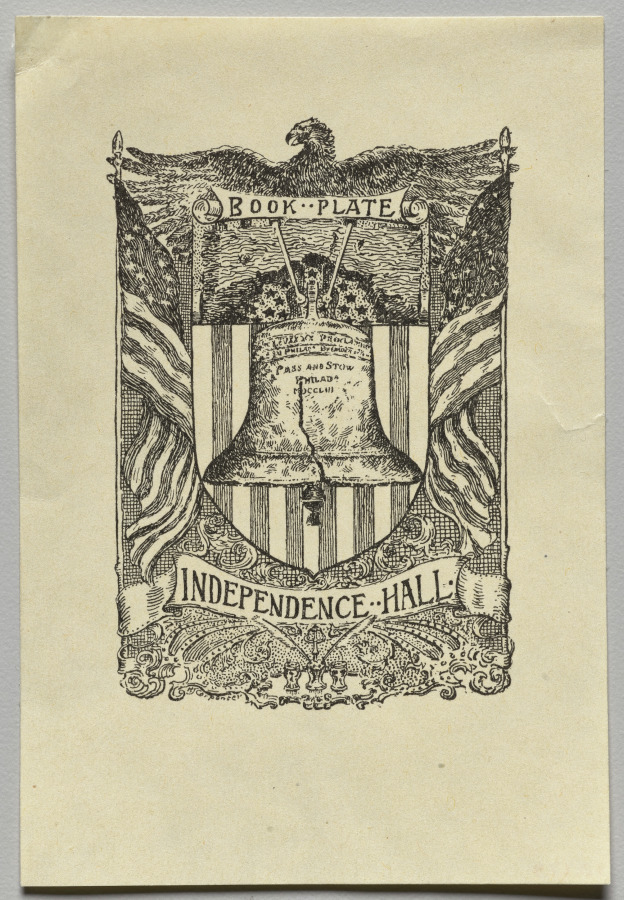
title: Bookplate: Independence Hall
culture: America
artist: Horace T. Carpenter (American, 1857–1947)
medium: engraving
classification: Print